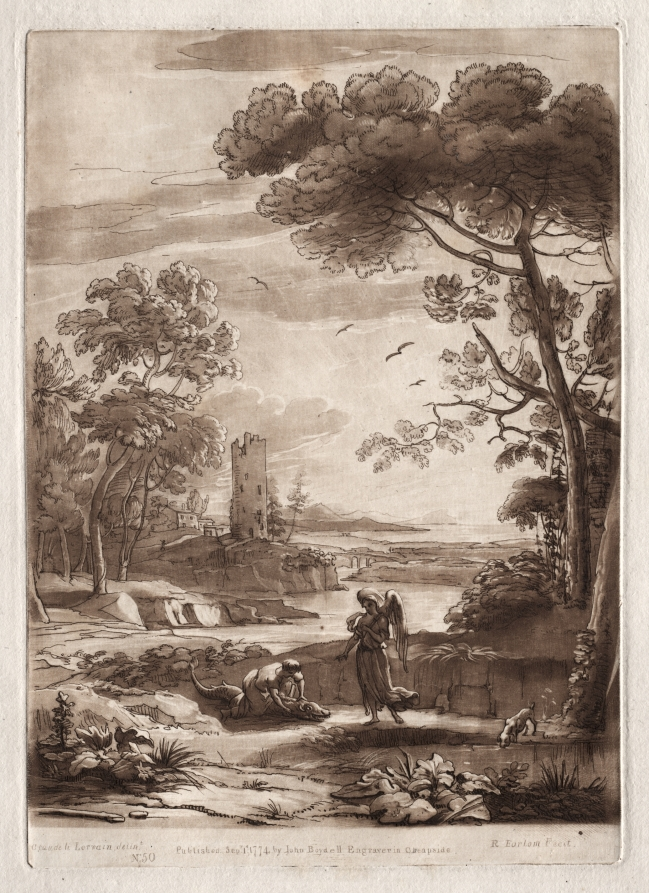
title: Liber Veritatis: No. 50, A River Scene with Tobias and the Angel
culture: England, 18th century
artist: Richard Earlom (British, 1743–1822)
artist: after Claude Lorrain (French, 1604–1682)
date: 1774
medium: etching and mezzotint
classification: Print